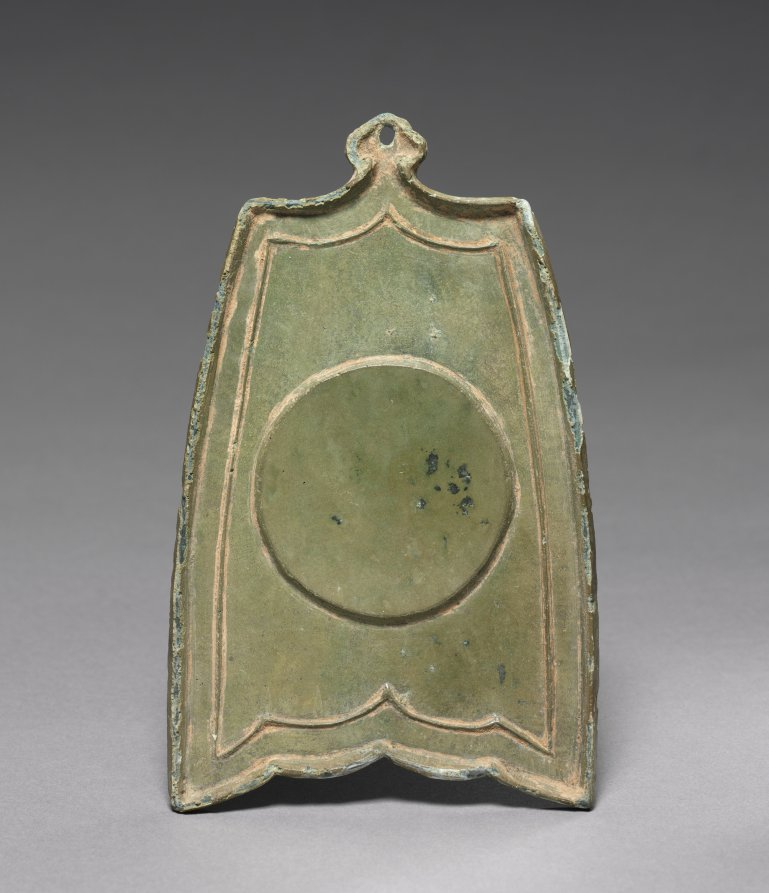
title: Bell-shaped Mirror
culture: Korea, Goryeo dynasty (918–1392)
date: 918–1392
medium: bronze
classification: Metalwork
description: From ancient times, a mirror assumed various roles: a ritualistic tool, a diplomatic gift, and a luxury commodity. During the Goryeo dynasty (918–1392), which saw the great advancement of metallurgy, the royal court was the center of distributing sophisticated bronze artifacts. According to historical records, on the seventh day of the Lunar New Year, the king bestowed a bronze mirror inscribed with auspicious symbols upon each court official as part of a ceremony to celebrate the Day of Humans. This bronze mirror features a round concave surface that serves as the main decoration. Such concave surface can be traced back to the ancient time when a concave mirror was used to start a fire from sunlight during the daytime.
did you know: Due to its origin as an important tool in religion and politics, mirrors are often mentioned in many Korean proverbs that warn about certain behaviors.